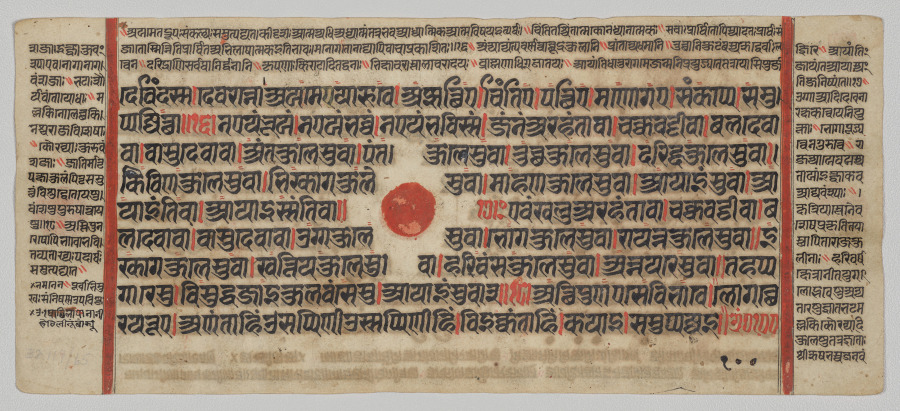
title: Text, Folio 8 (recto), from a Kalpa-sutra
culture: Western India, Gujarat, last quarter of the 15th century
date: c. 1475–1500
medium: Gum tempera, ink, and gold on paper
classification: Painting